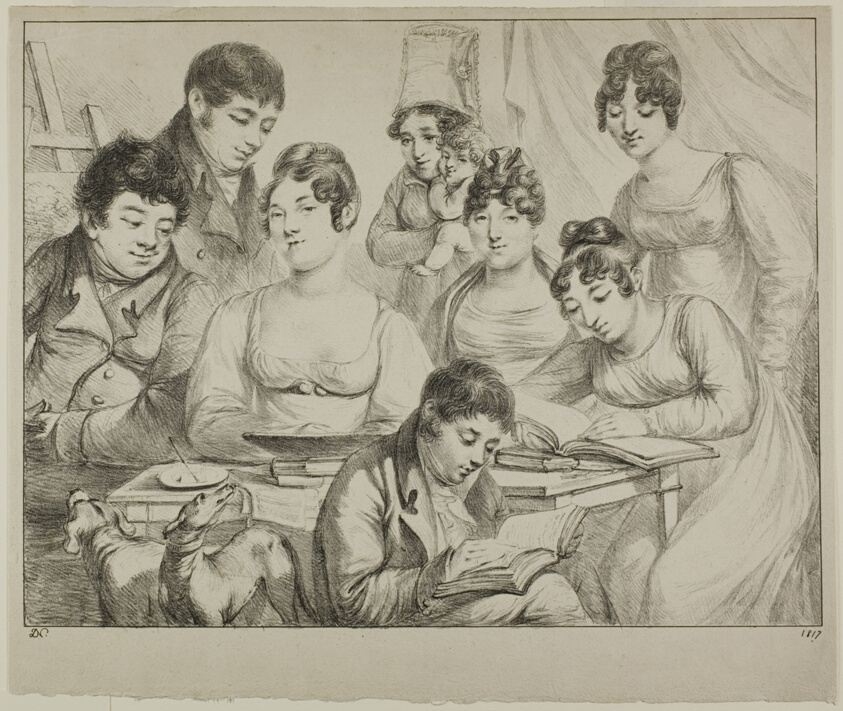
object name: Print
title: Conversation, a Family Drawing and Reading, the Nurse Holding an Infant, a Portrait of Prince Edmond de Beauvau Behind a Chair, and Portraits of Madame Lavallée and Madame Vallory, Both Seated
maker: Dominique-Vivant Denon (French, 1747-1825)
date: 1817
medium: Lithograph in black on pale gray laid paper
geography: France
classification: lithograph; print; prints and drawing